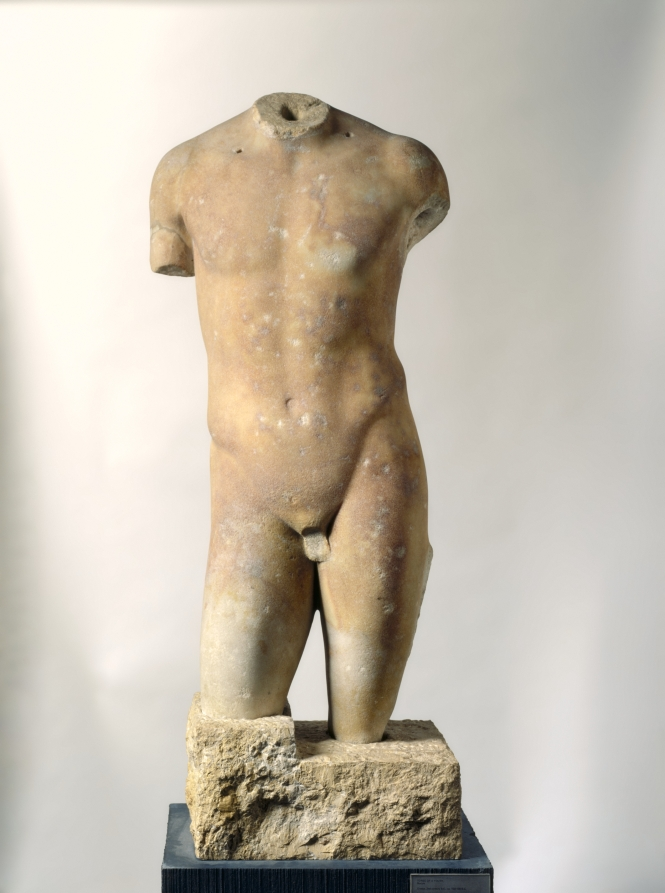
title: Torso of a Youth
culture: Greece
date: c. 150–100 BCE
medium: marble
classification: Sculpture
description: The exceptional workmanship suggests that this sculpture was carved by a Greek sculptor. Its incomplete state of preservation makes precise identification difficult, but it was most likely an Apollo or Dionysos, modeled in the soft, somewhat effeminate style of Praxiteles. The museum’s Apollo Sauroktonos is a useful parallel. The two drill holes in the upper chest are ancient and were possibly used to support separate long tresses of hair. The sculpture may well be a copy of a fourth-century original.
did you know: It was common practice in the 1700s and 1800s to attach new heads or limbs to fragmented ancient statues like this one.